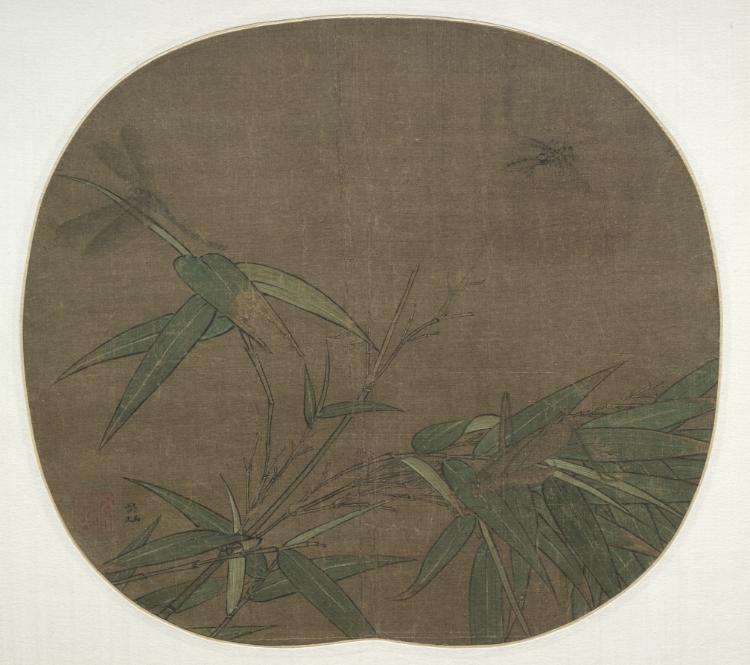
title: Bamboo and Insects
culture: China, Southern Song dynasty (1127-1279)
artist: Wu Bing (Chinese, active 1190–1194)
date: late 1100s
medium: Album leaf; fan painting, ink on silk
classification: Painting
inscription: Artist's signature at lower left: 吳炳 Wu Ping. 1 unidentified seal reading "Lo-hsi."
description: Wu Bing, a native of Piling, gained Empress Li’s favor and served as a painter-in-attendance at the court in Hangzhou during the Shaoxi reign (1190–94). The round fan painting shows a dragonfly hovering over a stalk of bamboo, a bush cricket (luowei) perching on a leaf, and a flying wasp. Yellow leaf tips suggest the late summer or early autumn season. The chirping of the cricket sounds similar to the sound of a working loom; the insect is therefore also called weaving lady (fangzhi niang). The weaving season starts when the weather is about to turn cold—the cricket symbolizes early autumn.